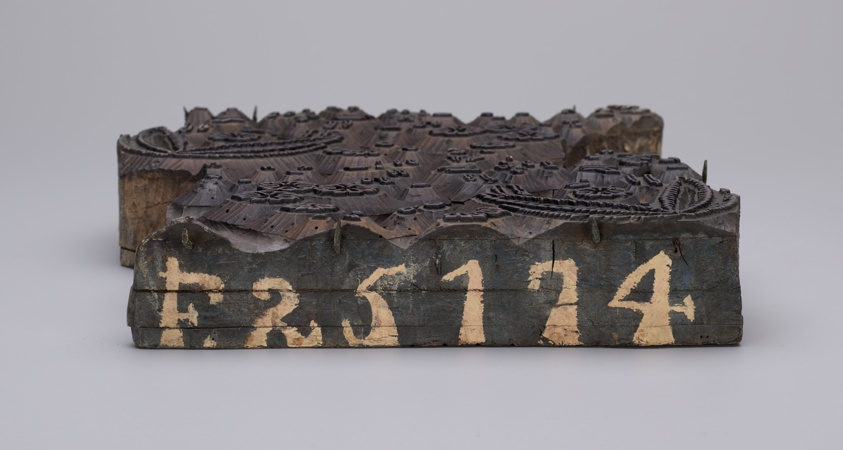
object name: Textile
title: Six Printing Blocks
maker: England or France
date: before 1850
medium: Carved wood, treated in a variety of techniques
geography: England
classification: printing blocks (printing surfaces); textile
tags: paisley